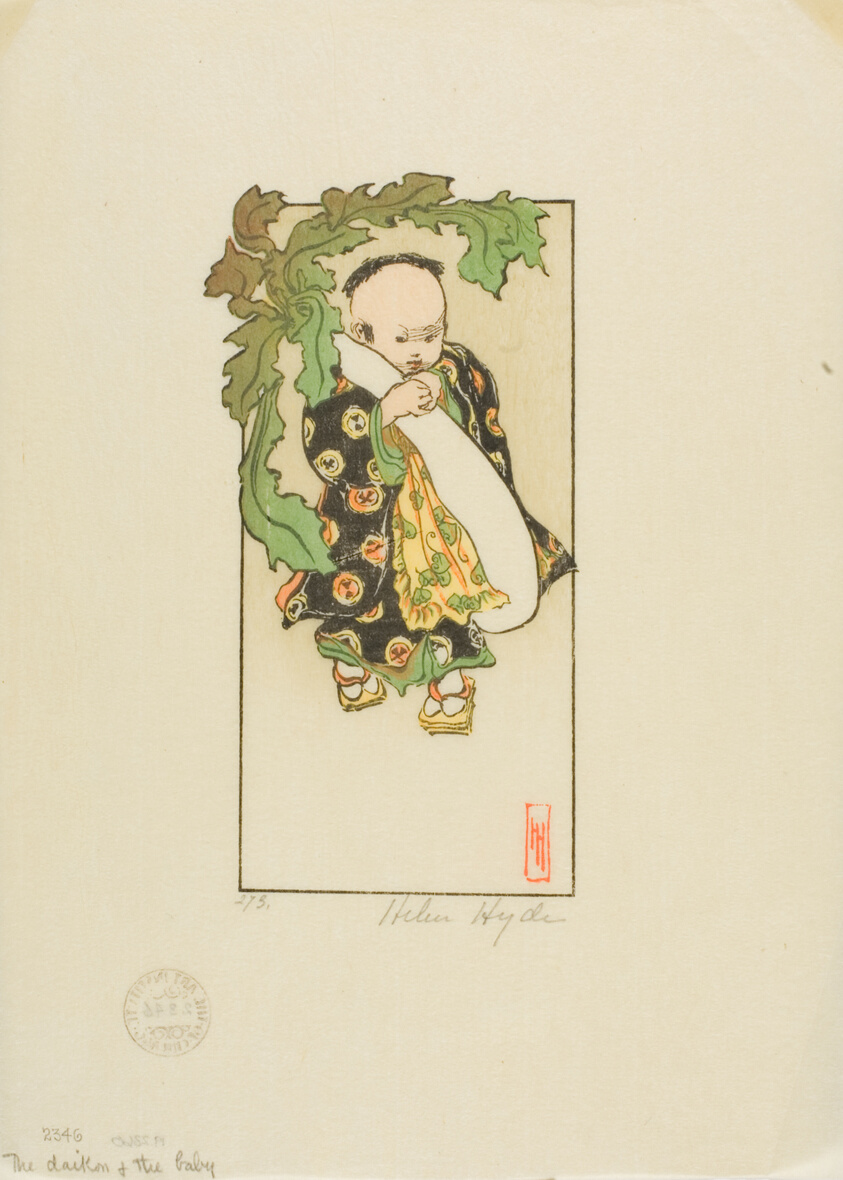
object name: Print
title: The Daikon and the Baby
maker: Helen Hyde (American, 1868-1919)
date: 1903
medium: Color woodcut on cream Japanese paper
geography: United States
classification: woodcut; print; prints and drawing